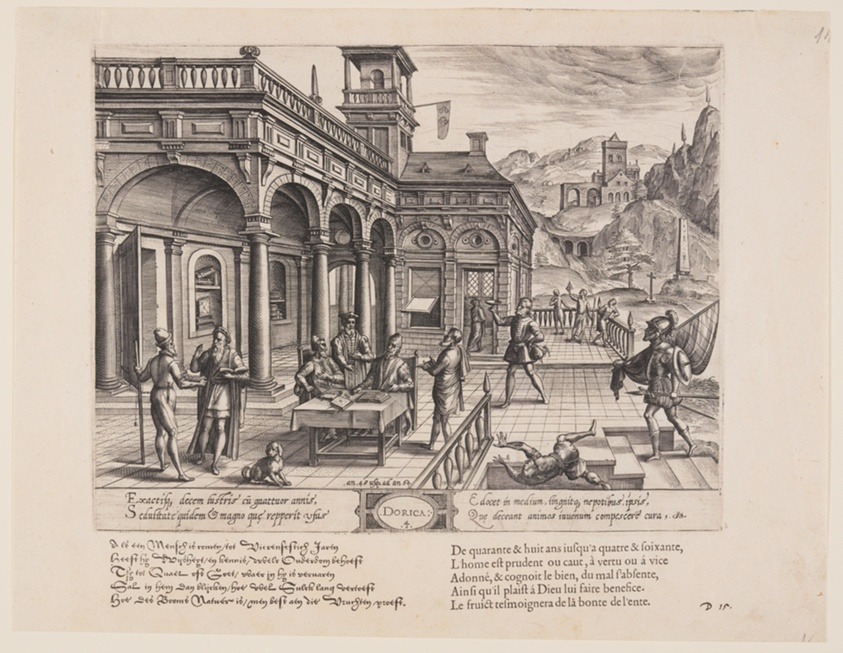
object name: Print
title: Dorica, from Theatrum Vitae Humanae (The Ages of Man)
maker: Jan Wierix (Flemish, 1549–c. 1618)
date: 1577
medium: Engraving on ivory laid paper, with letterpress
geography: Flanders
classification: engraving; paper; print; prints and drawing